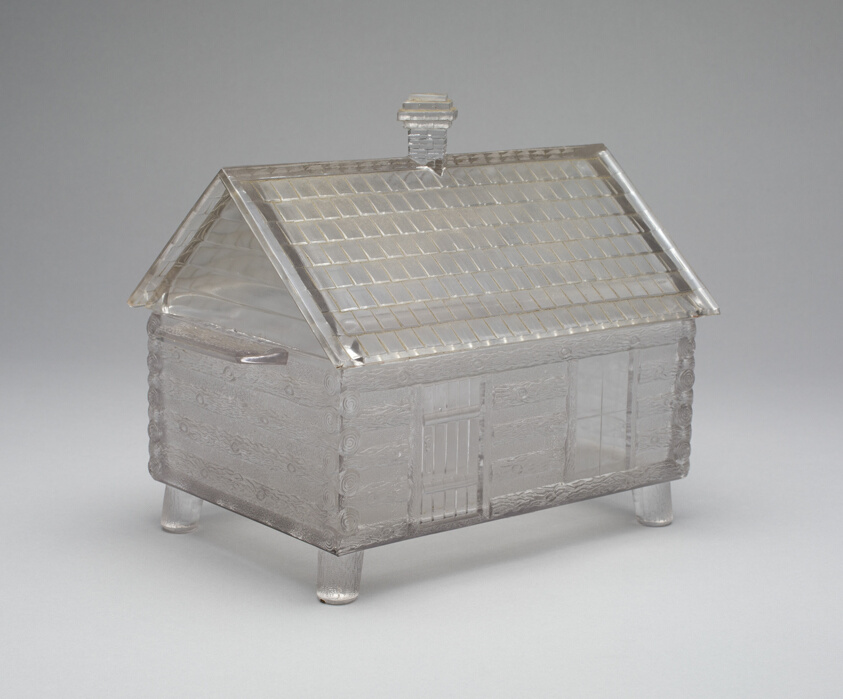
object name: Glass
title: "Log Cabin" pattern covered dish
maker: Central Glass Company; American, 1867–1896; Wheeling, West Virginia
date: c. 1875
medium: Pressed glass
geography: Wheeling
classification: dish (vessel); glass; american decorative arts; american arts; decorative arts